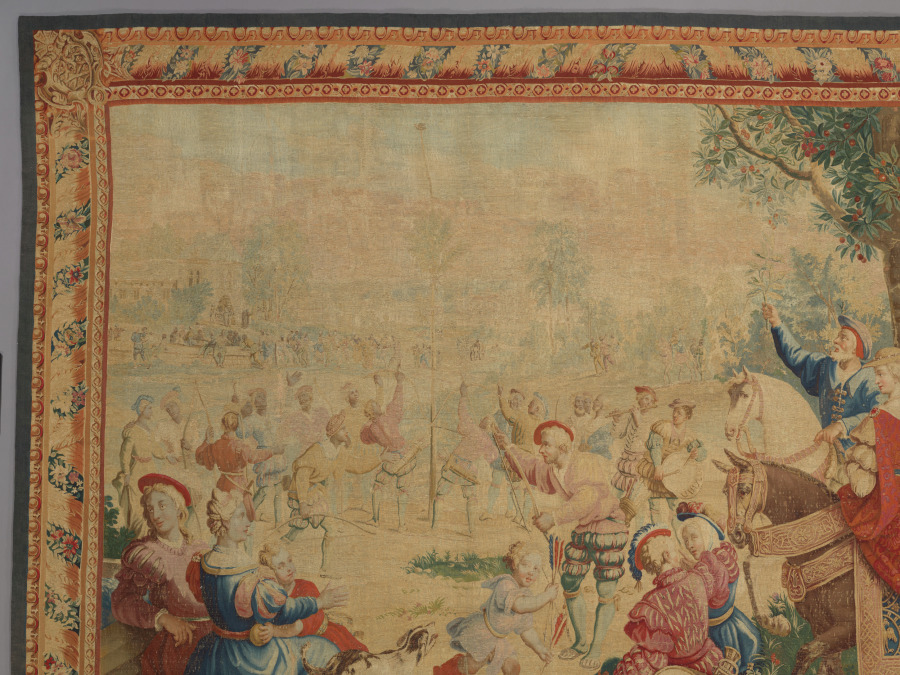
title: Month of May: Scene of May Day Festival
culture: France, 18th century, Period of Louis XV (1723-1774)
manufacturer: Gobelins Manufactory (France, Paris, est. 1662)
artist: Michel Audran (French, 1701–1771)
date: 1723–1774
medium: tapestry weave: linen warp, wool and silk wefts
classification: Tapestry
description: Seated spectators and splendidly clothed ladies and gentlemen on horseback watch May Day festivities in this tapestry. In the middle distance, archers prepare to shoot at a bush and bird placed atop a maypole, while more spectators congregate in the receding landscape. A border of rolled acanthus leaves and flower garlands frames the scene. This scene is one of twelve so-called Months of Lucas tapestries, each depicting activities that coincide with a month of the year. The original “Months of Lucas” was a sixteenth-century Flemish tapestry set that was owned by the French monarchy and mistakenly attributed to Lucas van Leyden during the 1600s. To this day, they continue to be known as the “Months of Lucas.” This original set was burned in 1797 so their gold and silver metal threads could be used to replenish the depleted French coffers. Beginning in the 1600s, the popular Months of Lucas were reproduced in several different versions under various masters at the Gobelins Manufactory in Paris, the famous royal production center for French tapestries since Louis XIV (1638–1715). The lower right hand corner of this tapestry bears the signature of Michel Audran (1701–1771), director of the Gobelins high-warp loom workshop from 1732–71, who produced this tapestry for a private patron in addition to the other royal commissions of the set.